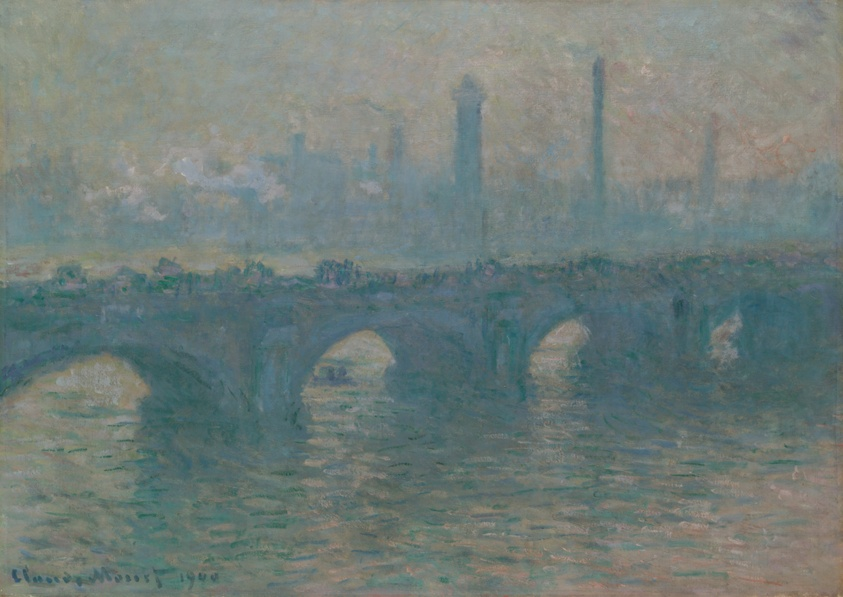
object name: Painting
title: Waterloo Bridge, Gray Weather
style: Impressionism, 20th Century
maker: Claude Monet (French, 1840–1926)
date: 1900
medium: Oil on canvas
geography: France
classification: painting; european painting; french; oil paintings (visual works); oil on canvas; modern and contemporary art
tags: london, tower, smoke, building, bridge, weather/seasons, landscapes, water, urban life